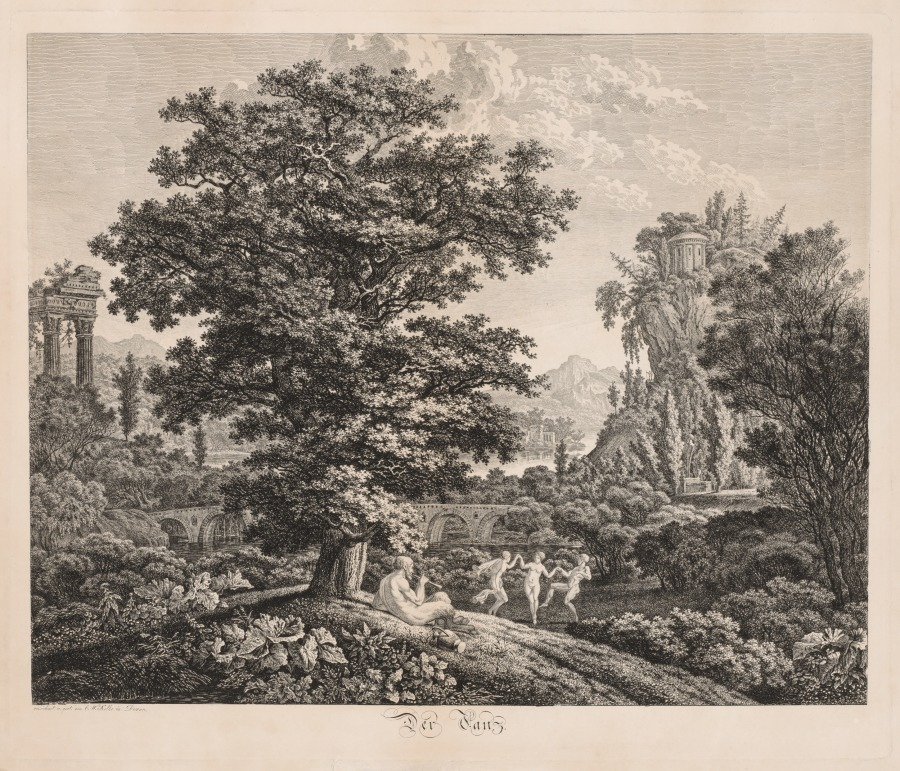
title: The Dance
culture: Germany, 18th-19th century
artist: Carl Wilhelm I Kolbe (German, 1757–1835)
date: 1799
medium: engraving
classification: Print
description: The Dance represents a stylistic fusion of classicism and scientific naturalism that dominated landscape art at the end of the 18th century. The circle of nudes dancing to a satyr’s music, ancient ruins, and sacrificial alter evoke a classical idyll, while the surrounding landscape, particularly the tree and foreground burdocks, are rendered with botanical precision.